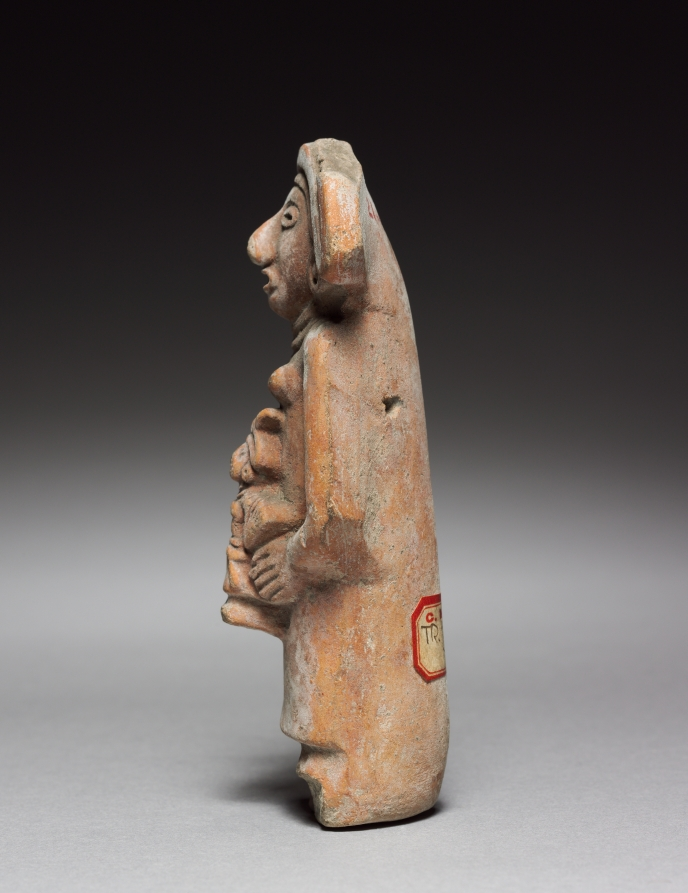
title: Mother-and-Child Figurine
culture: Mexico, Aztec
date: 1325–1521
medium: Ceramic, pigment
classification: Ceramic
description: The hair of this hollow, mold-made, female figurine was originally arranged in two projections atop the head. She carries an identical, small figure interpreted as a child; the figurine may be a metaphor for generational continuity.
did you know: This mother-and-child figurine may be a metaphor for generational continuity.